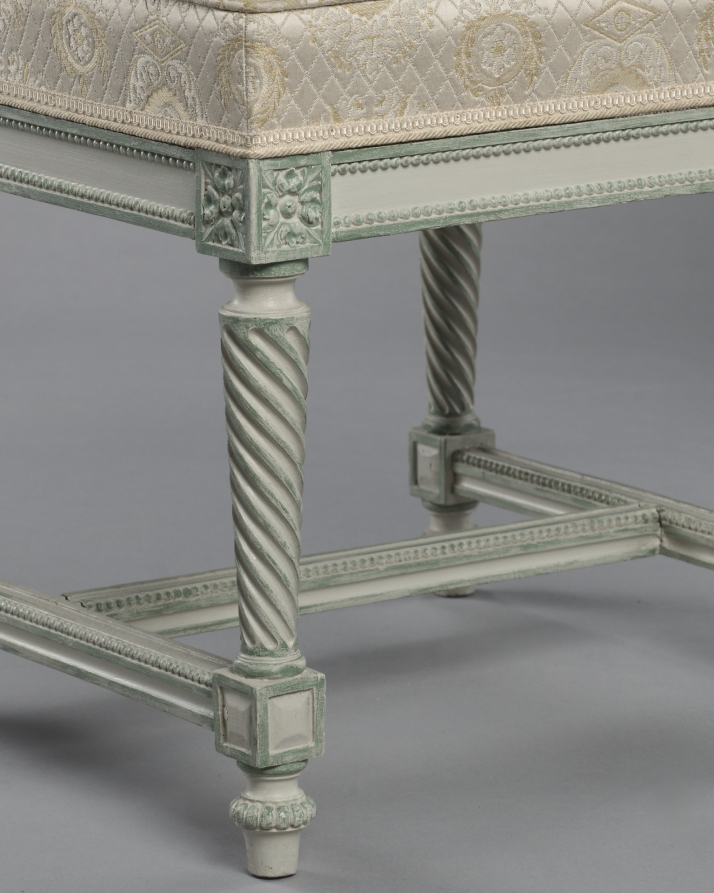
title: Stool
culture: France, Paris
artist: François-Honoré-Georges Jacob (French, 1770–1841)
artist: Georges Jacob (French, 1739–1814)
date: 1805–1813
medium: painted walnut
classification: Furniture and woodwork